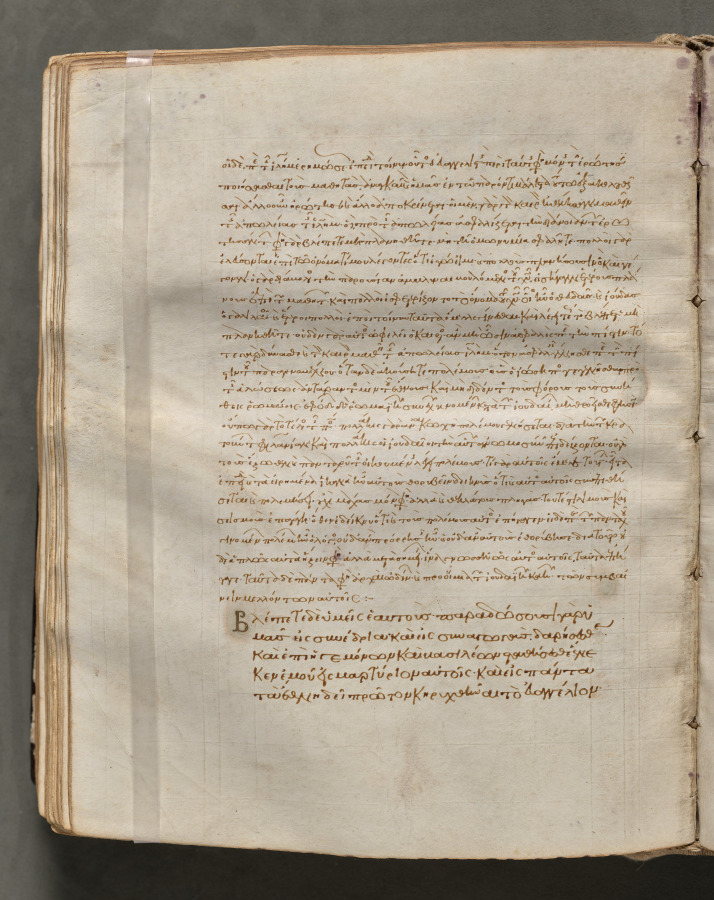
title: Text, folio 181 (verso), from a Gospel Book with Commentaries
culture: Byzantium, Constantinople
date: c. 1000–1100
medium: ink, tempera, and gold on vellum; leather binding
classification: Bound Volume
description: Each of the four gospels in this book opens on a page with brilliantly illuminated borders depicting the author of the text as well as birds-principally peacocks, symbols of the immortality of the soul-and fountains, representing the fountain of life and the salvation of the soul. This volume consists of 428 leaves with texts in Greek. Its level of sophistication suggests that it was probably written and decorated in a monastery in Constantinople.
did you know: Gospel Books were carried in procession through Byzantine churches.